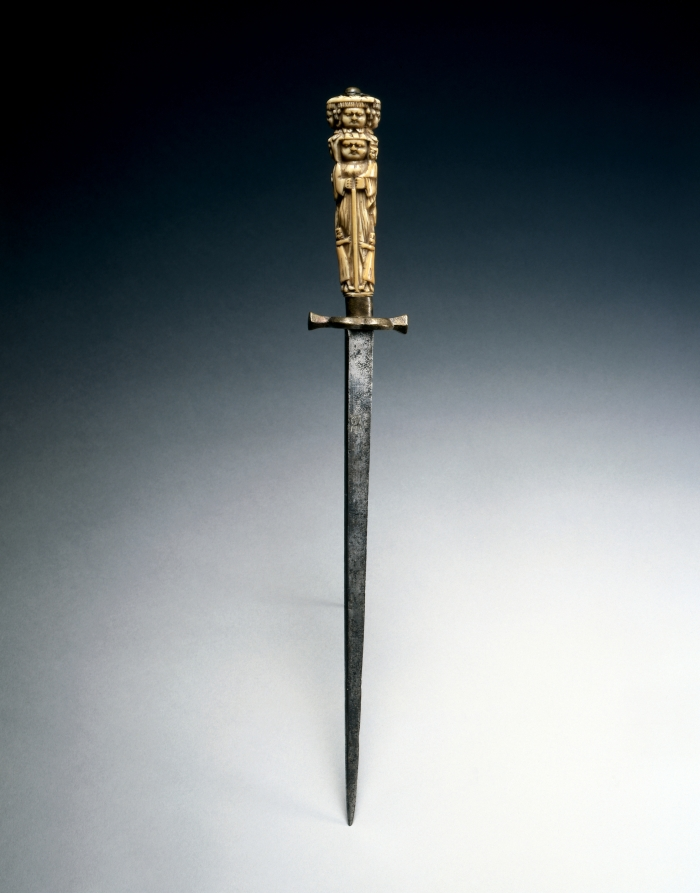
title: Stiletto with Grip Fashioned as Figures of Charity, Justice, and Hope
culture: Italy, 17th century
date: c. 1650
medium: steel, brass, ivory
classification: Arms and Armor